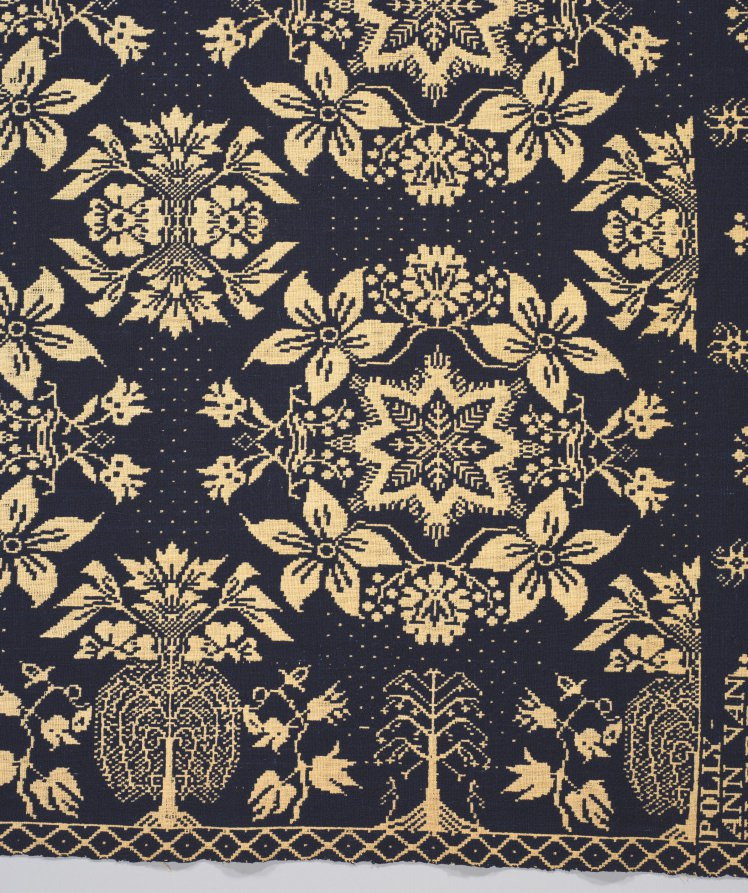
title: Coverlet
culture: America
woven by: J.M. Davidson (American)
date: 1837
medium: double weave; blue wool and white cotton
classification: Textile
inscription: Two lower corners have inwoven inscription; text in the left corner is legible, text in right corner is reversed: "POLLY - ANN VANVLEET BORN 1816 J.M. DAVIDSON FANCY - WEAVER. LODI, 1837"